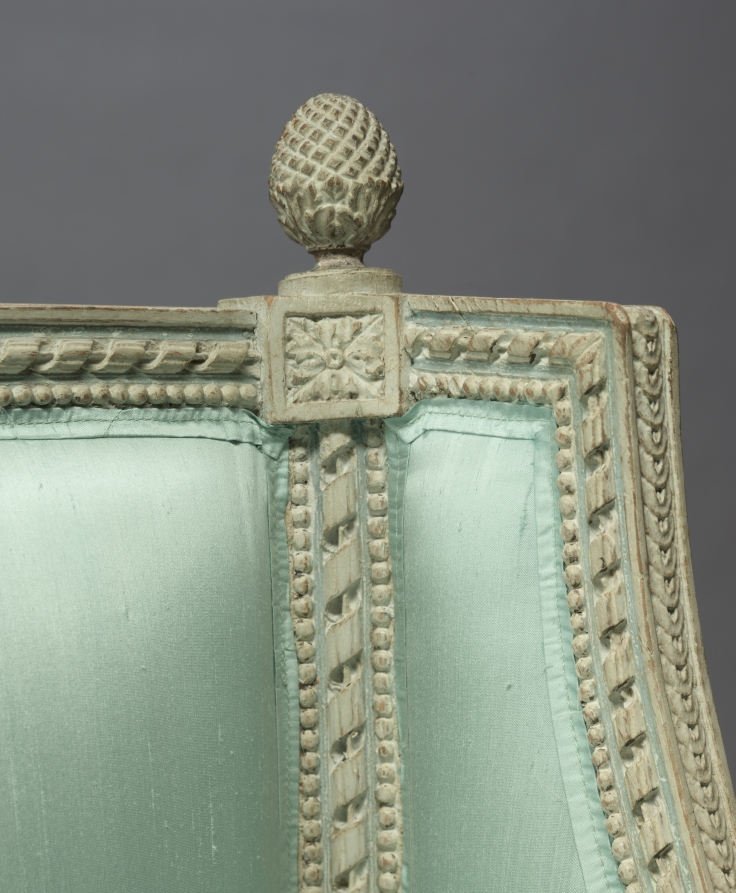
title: Settee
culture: France, 18th century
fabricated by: Philippe-Joseph Pluvinet (French, 1793)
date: c. 1780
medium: painted wood and upholstery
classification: Furniture and woodwork